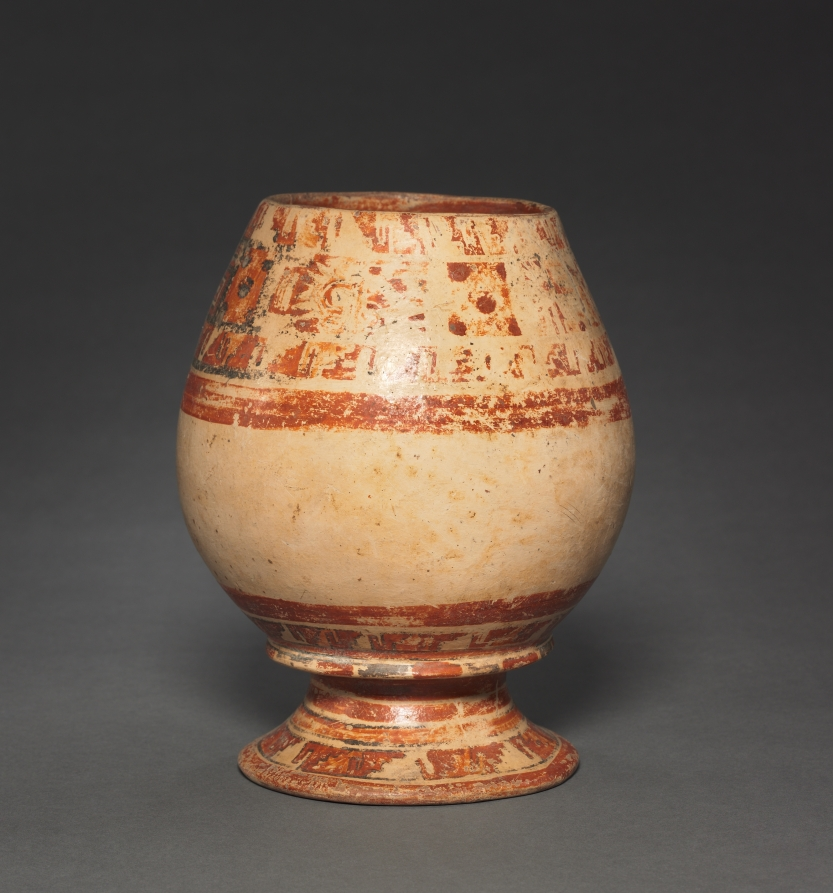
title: Vase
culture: Costa Rica, Filadelphia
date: 1000–1550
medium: earthenware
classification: Ceramic